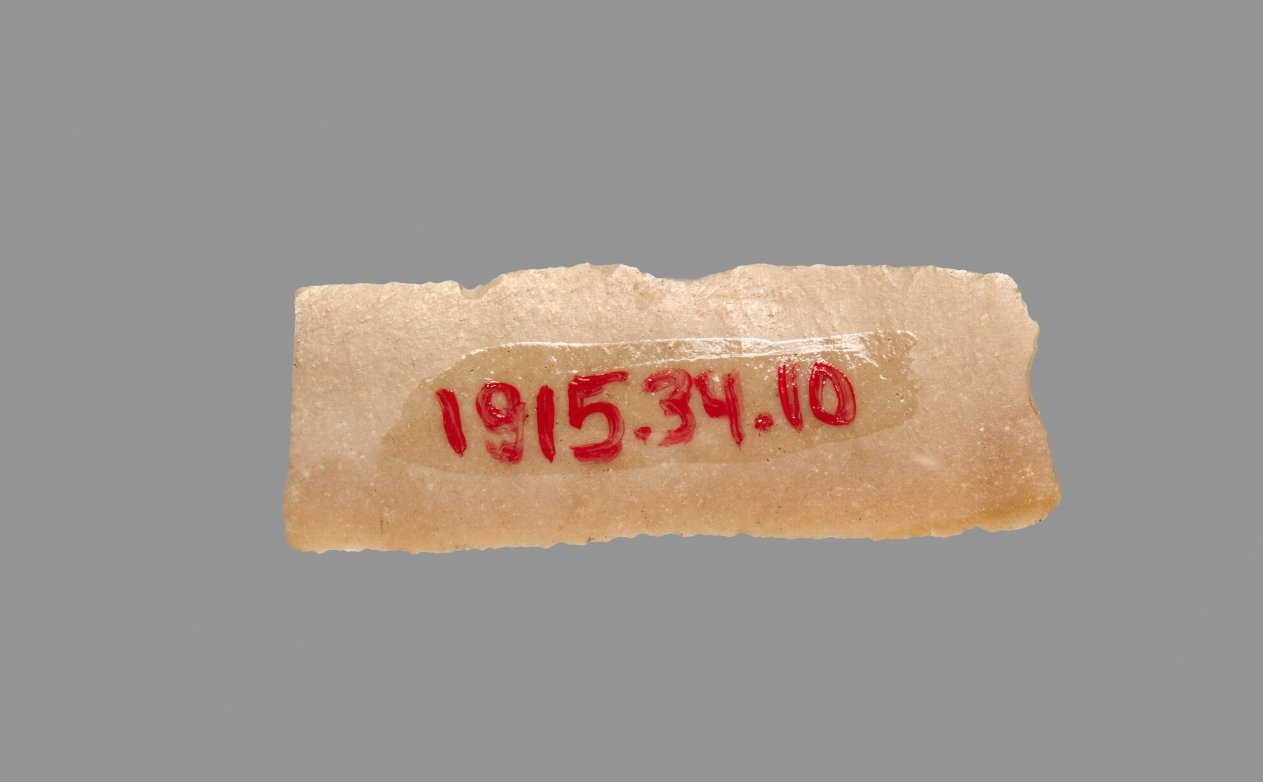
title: Sickle Blade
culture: Egypt, Middle Kingdom (2040–1648 BCE), Dynasty 12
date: 1980–1801 BCE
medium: flint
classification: Implements